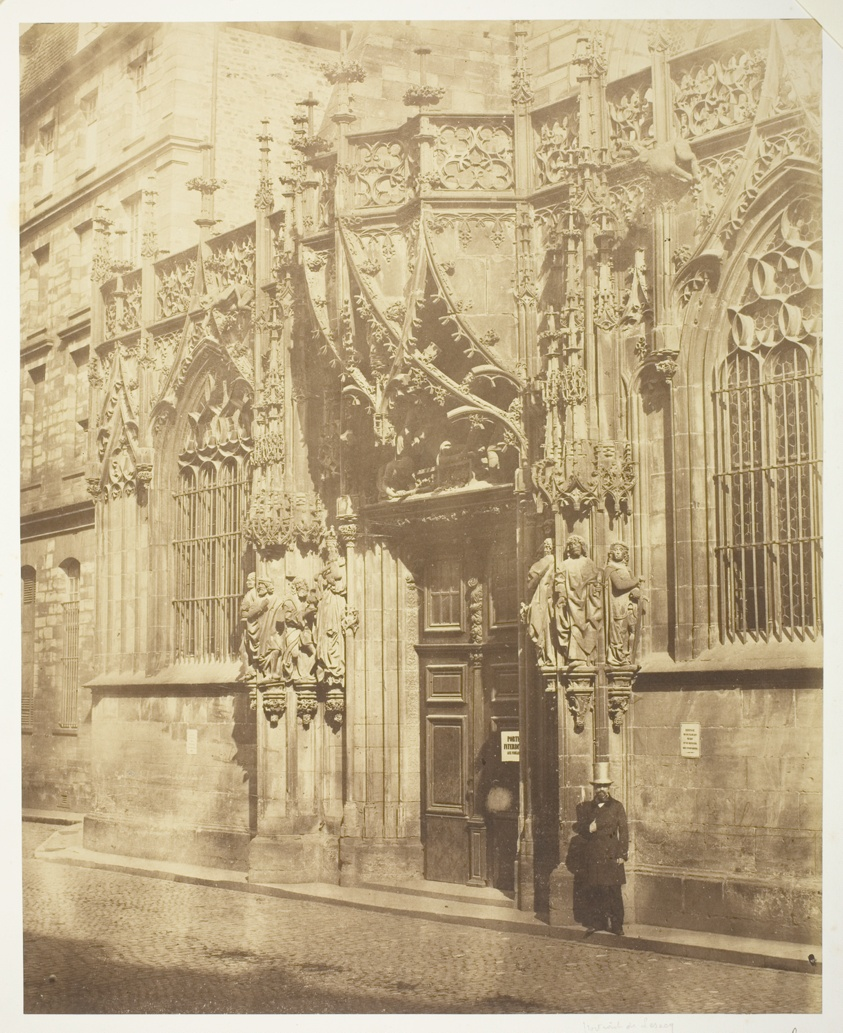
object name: Photograph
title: Portrait of Lesecq, Strasbourg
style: 19th century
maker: Bisson Frères (Louis-Auguste Bisson, French, 1814–1876 and; Auguste-Rosalie Bisson, French, 1826–1900)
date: 1854, printed 1854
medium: Albumen print, from the album "Reproductions photographiques des plus beaux types d’architecture et de sculpture"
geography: France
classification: albumen silver print; photographic process; photography; photograph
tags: Collected by Hugh Edwards, architecture